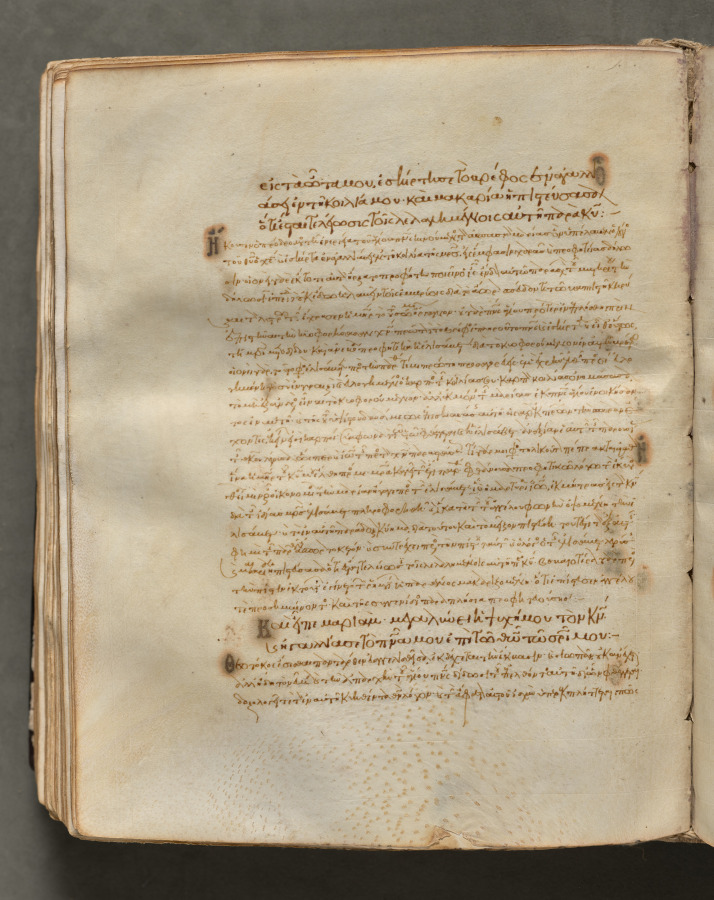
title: Text, folio 204 (verso), from a Gospel Book with Commentaries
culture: Byzantium, Constantinople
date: c. 1000–1100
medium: ink, tempera, and gold on vellum; leather binding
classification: Bound Volume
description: Each of the four gospels in this book opens on a page with brilliantly illuminated borders depicting the author of the text as well as birds-principally peacocks, symbols of the immortality of the soul-and fountains, representing the fountain of life and the salvation of the soul. This volume consists of 428 leaves with texts in Greek. Its level of sophistication suggests that it was probably written and decorated in a monastery in Constantinople.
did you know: Gospel Books were carried in procession through Byzantine churches.